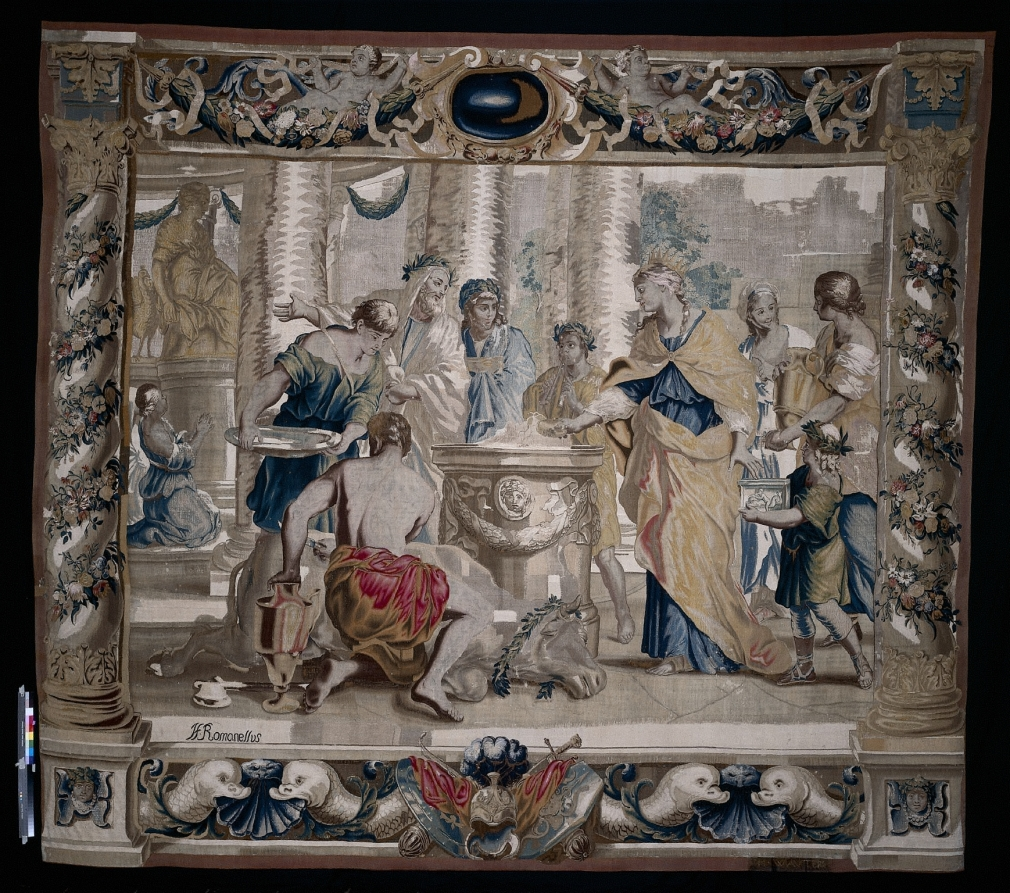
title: Dido Sacrifices to Juno, the Goddess of Marriage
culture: Belgium, 17th century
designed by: Giovanni Francesco Romanelli (Italian, 1610–1662)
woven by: Michael Wauters (Flemish, 1679)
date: 1679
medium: tapestry weave: silk and wool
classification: Tapestry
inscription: signed lower right: M. Wavters; signature lower left: J. F. Romanellus.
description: Dido loves Aeneas and offers a sacrifice to the gods, specifically Juno, the goddess of marriage, to keep him in Carthage. Priests prepare to cut open the newly slaughtered heifer and read the future in its entrails.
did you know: This tapestry is one from a series of eight that depicts the tragic love story of Dido and Aeneas. They were gifted to the museum for display in the armor court.